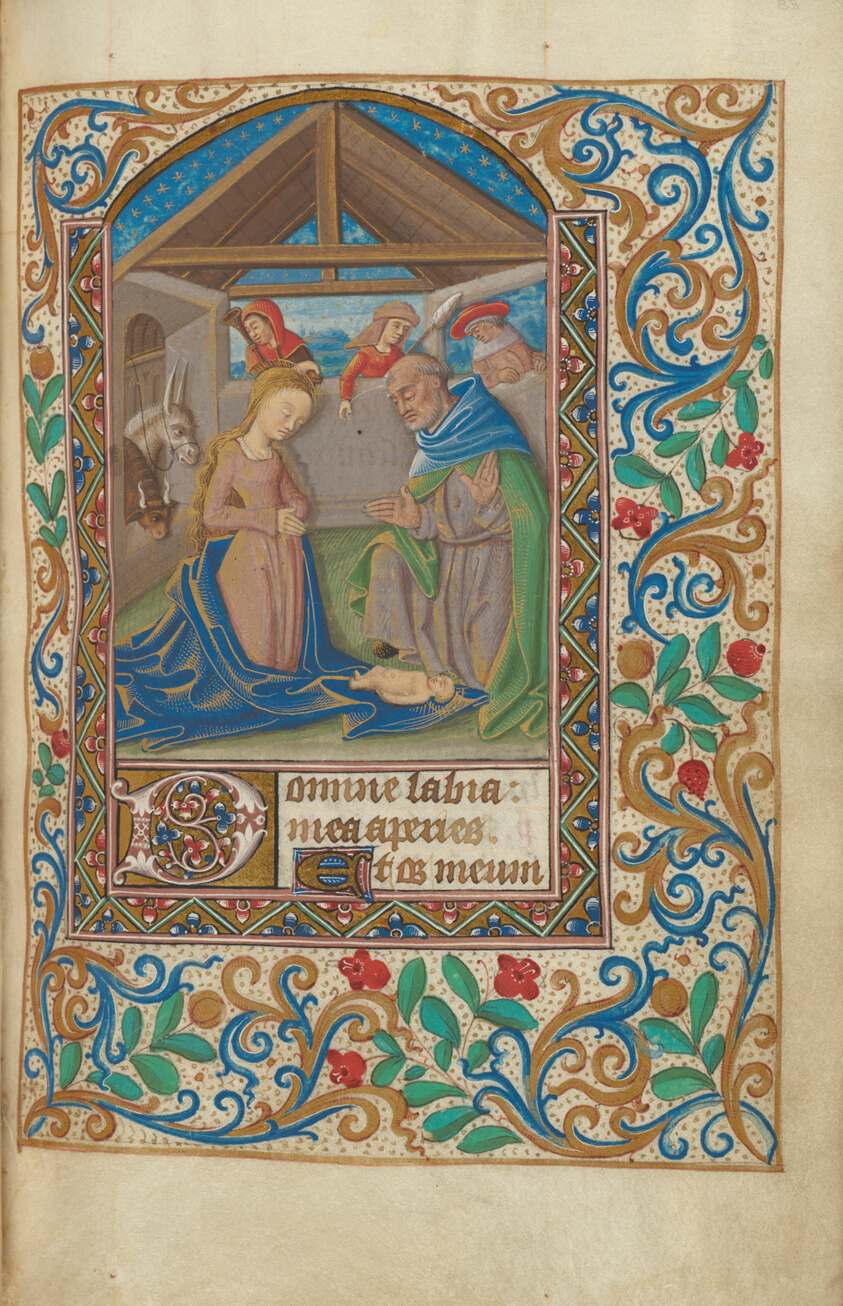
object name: Book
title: Book of Hours for the Use of Limoges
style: medieval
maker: Master of Catherine Gentille (French, active in Limoges, c. 1480-1510)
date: 1480/1500 (late 15th century binding)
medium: Manuscript with 182 folios, 11 miniatures, 15 historiated initials and other decorations in tempera, gold leaf and colored inks, and littera textualis inscriptions in Latin and French, in light black ink, ruled in red, on parchment, bound in leather stamped with various designs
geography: France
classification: pen and ink drawings; manuscript; book; prints and drawing